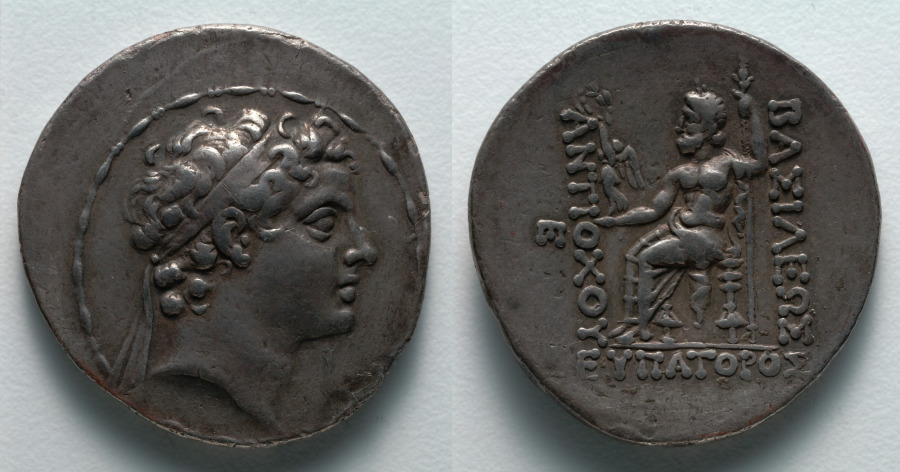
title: Tetradrachm: Head of Antiochos V (obverse); Zeus (reverse)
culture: Greek, Seleukid, minted at Antioch (Syria), reign of Antiochos V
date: 164–162 BCE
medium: silver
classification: Coins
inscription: ΒΑΣΙΛΕΩΣ | ΑΝΤΙΟΧΟΥ | ΕΥΠΑΤΟΡΟΣ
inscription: Τ within Π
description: Thrust into power while still a child, Antiochos V used coinage to legitimize his tenuous control. On the obverse of this coin, Antiochos appears like many Hellenistic kings, with heavy hair curls and a diadem. On the reverse, a seated Zeus holds the goddess of victory, Nike, who crowns Antiochos’s name with a wreath, confirming his divine right to rule.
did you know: Antiochos V’s boyish portrait reflects his accession to the Seleucid throne at 9 years of age.